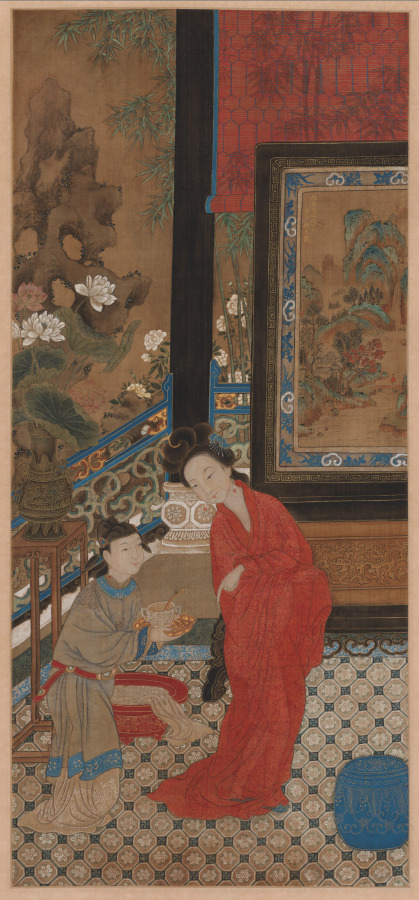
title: Yang Guifei Leaving the Bath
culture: China, Qing dynasty (1644-1911)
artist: Gu Jianlong (Chinese, 1606–after 1689)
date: 1700s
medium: Hanging scroll; ink, colors and gold on silk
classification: Painting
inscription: 丙辰冬至後二日 雲臣顧見龍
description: This painting relates to the legendary love story between Tang dynasty (618–906) emperor Xuanzong and his consort, the beautiful Yang Guifei. Set in what appears to be an 18th-century southern interior, the artist depicts Yang Guifei in a fashionable dress of semitransparent red gauze. Due to the warm and humid climate in China’s southeast, local silk workshops specialized and excelled in making airy gauze garments. Yang’s nude body can be seen through the red robe as she leaves the bath. Her servant offers her a bowl of soup. The presence of a male figure would have been a breach of customary protocol; cross-dressed as a male scholar, the earrings reveal that Yang’s attendant is in fact a girl.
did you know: Due to the warm and humid climate in China’s southeast, silk workshops specialized in making airy gauze garments, like the one worn by Yang Guifei here.